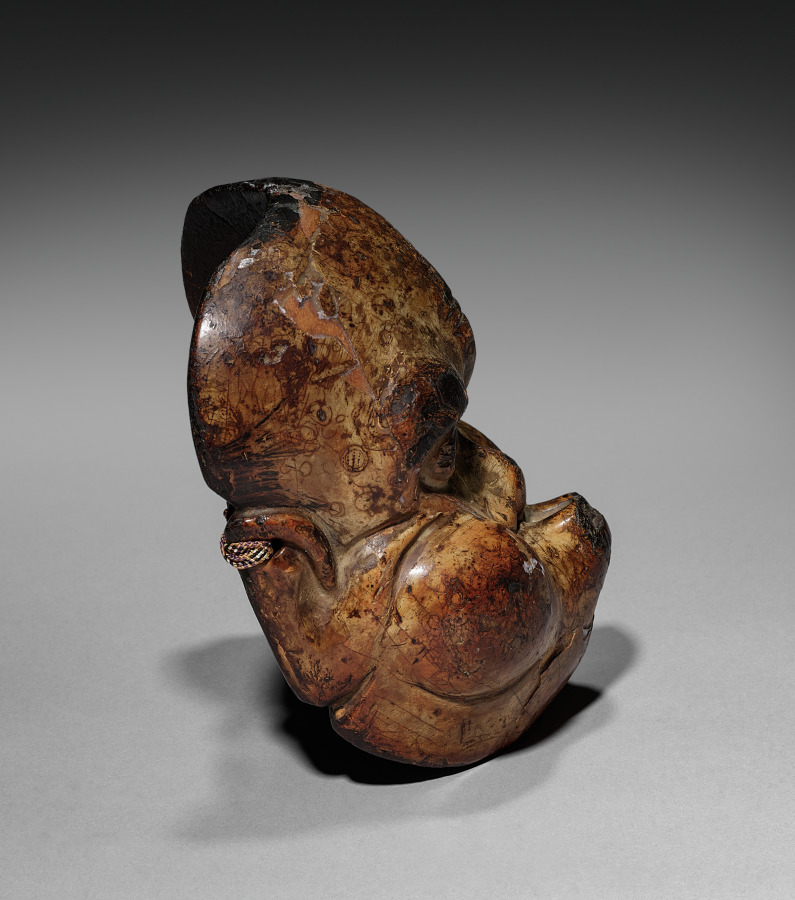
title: Kyogen Mask: Whistler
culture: Japan, Edo period (1615–1868)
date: 1600s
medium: wood with color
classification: Sculpture